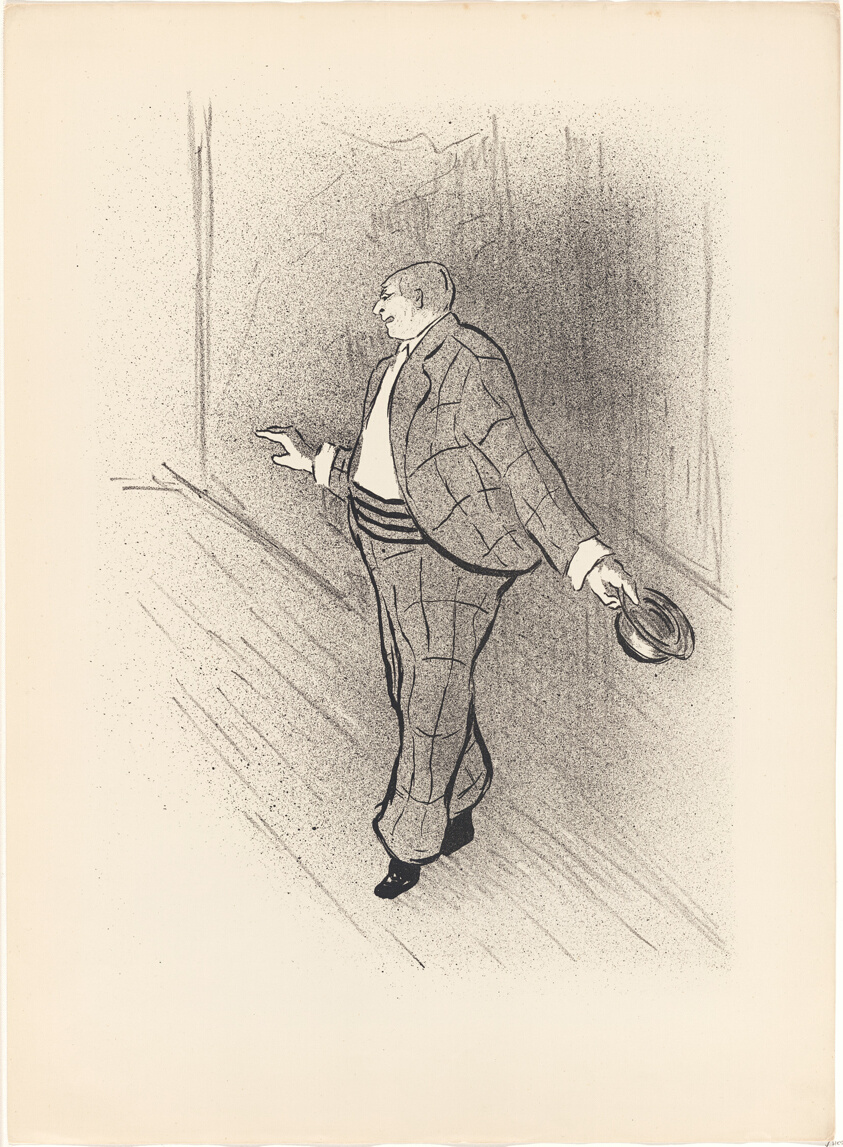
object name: Print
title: Libert, from Le Café-Concert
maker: Henri-Gabriel Ibels (French, 1867-1936); printed by Edward Ancourt & Cie (French, 19th-20th century); published by L'Estampe originale (French, 1893-1895)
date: 1893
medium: Lithograph on cream wove paper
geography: France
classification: lithograph; print; prints and drawing